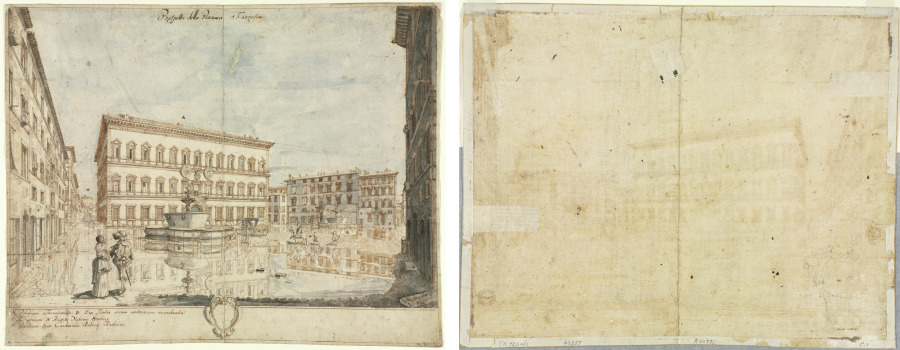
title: Eighteen Views of Rome: The Piazza Farnese (recto); Cartouche (verso)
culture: Flanders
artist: Lievin Cruyl (Flemish, c. 1640-c. 1720)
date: 1664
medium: pen and brown ink and brush and gray and blue wash over graphite; squared in graphite (two figures in the foreground); framing lines in brown ink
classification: Drawing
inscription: recto: signed, lower right, in brown ink: [artist's monogram: LC] inv. et delin. / 1664. ; by artist, upper center, in brown ink: Prospetto della Piazza Farnesia. ; by artist, througout composition, in brown ink: [the letters A-D] ; by artist, lower left, in brown ink: A. Palatium Farnesiorum. B. Duo Fontes aream anteriorem mundantes. / C. Oratorium S. Brigitte Nationis Sweciæ / D. Palatium Em: Cardinalis Antonij Barberini. verso: ON STRIPS OF PAPER MOUNTED TO PERIMETER, lower center, in graphite: A20971 ; lower right, in graphite: E. 1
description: Flemish artist Lieven Cruyl made a number of drawings of emblematic vistas of Rome for the Roman publisher Giovanni Battista de Rossi, of which ten were published as etchings in 1666. The Piazza Farnese features architecture designed by Michelangelo, who completed the Palazzo Farnese after the death of its original designer, Antonio da Sangallo, in 1546. His main contribution was the third story and the significantly protruding cornice at the top of the facade, which dramatically hangs over the front of the building, like sculpture.